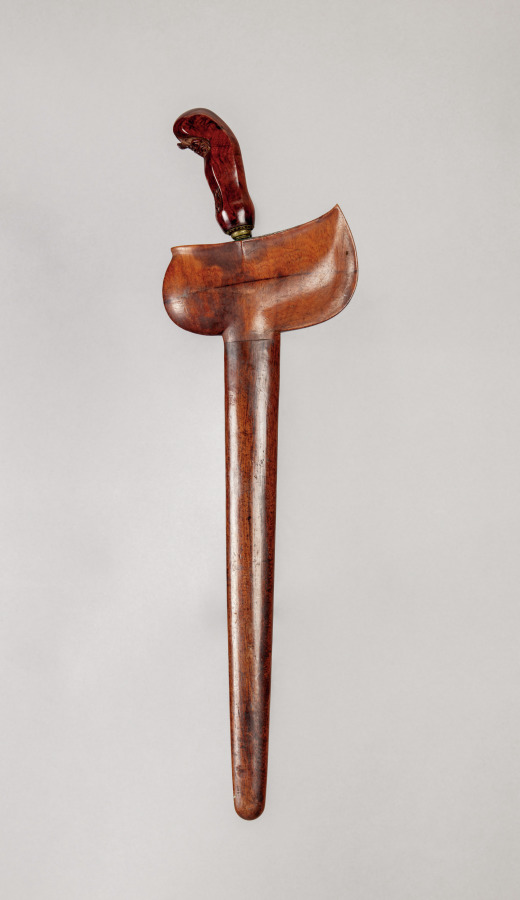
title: Sword (Kris)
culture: Java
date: 1800s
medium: iron with carved wooden handle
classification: Arms and Armor